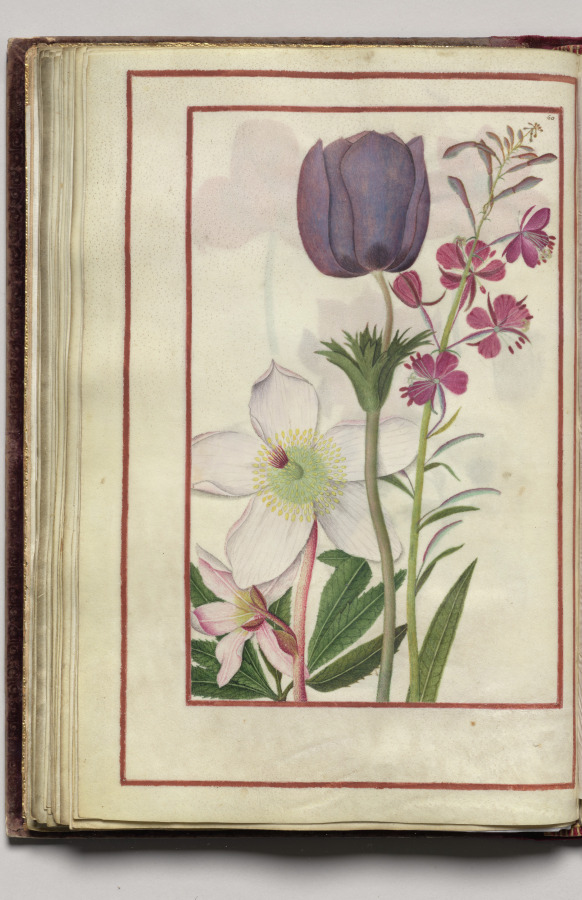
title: Anemones and Hellebore, folio 30 (verso), from Florilegium (A Book of Flower Studies)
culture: France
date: 1608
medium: watercolor, ink, silver, and gold over occasional traces of pencil, on vellum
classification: Bound Volume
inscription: Dated: Poitiers 1608 (on frontispiece) Signed: On frontispiece in black ink, lower right: Van Kuyk Notation on drawing: Frontispiece: in pencil, lower margin: * élève de Van Kessel, peintre flammand (* in pencil also appears in front of Van Kuyk's name).